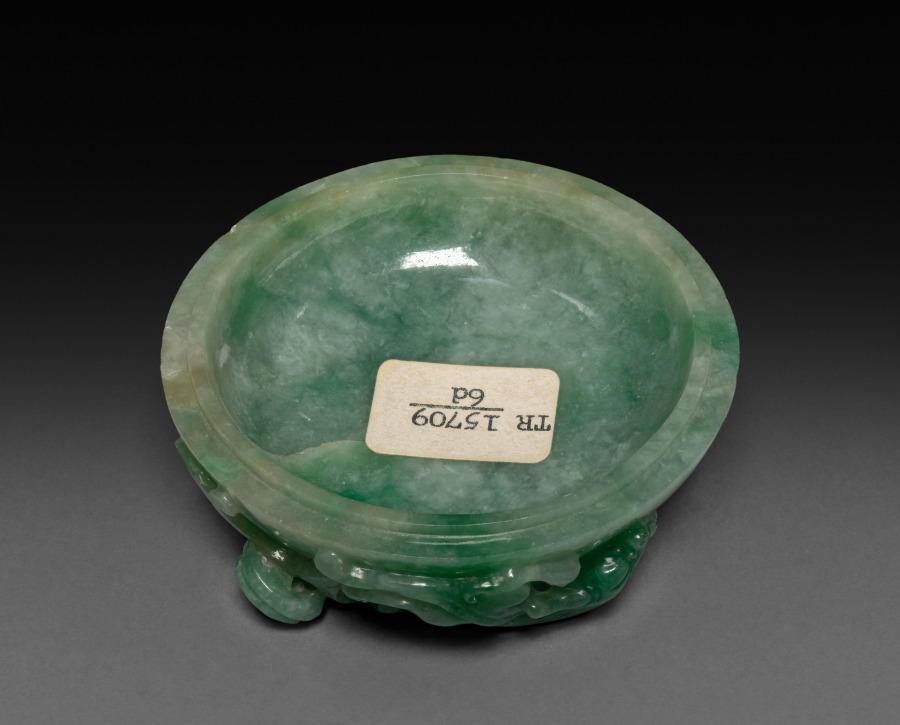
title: Three-Sectional Altar Group: Small Bowl with Carved Dragon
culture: China, Qing dynasty (1644-1911)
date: 1644–1911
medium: jade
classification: Jade